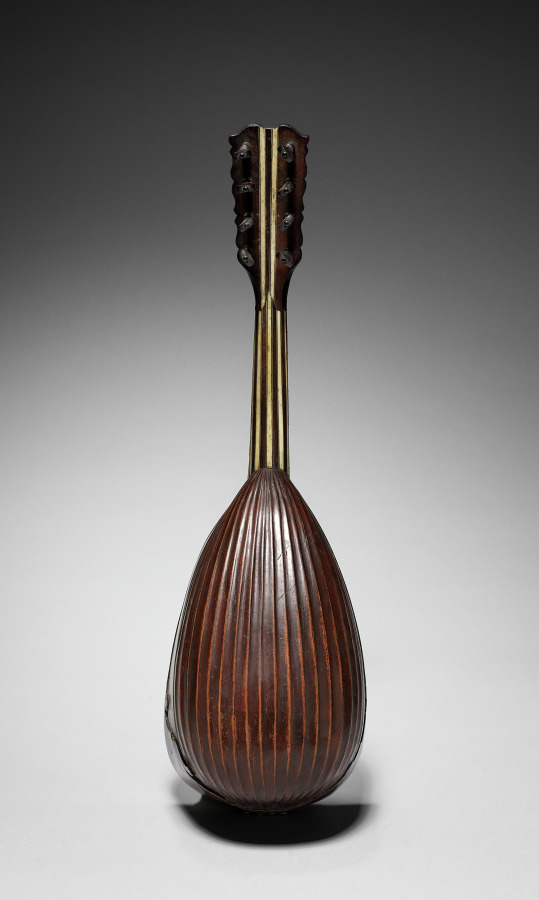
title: Mandoline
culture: Italy, Naples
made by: Giovanni Battista (Italian)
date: 1785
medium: wood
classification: Musical Instrument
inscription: bears a label which reads: "Gio: Battista Fabricatore fecit An 1785 in S. M. dell' Ajuto Napoli."